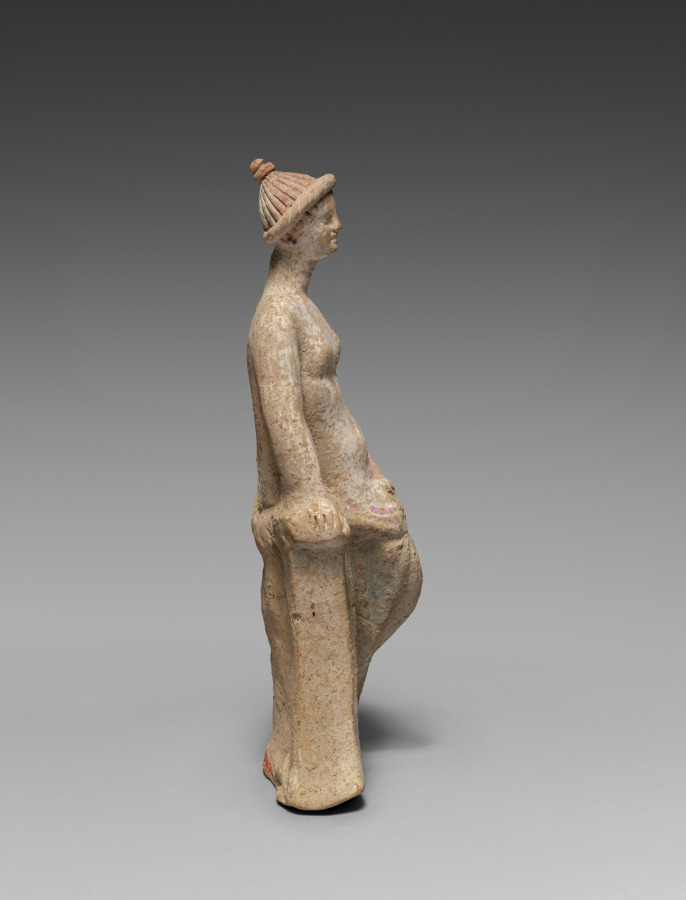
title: Figurine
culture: Greece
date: 300–100 BCE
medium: terracotta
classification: Sculpture